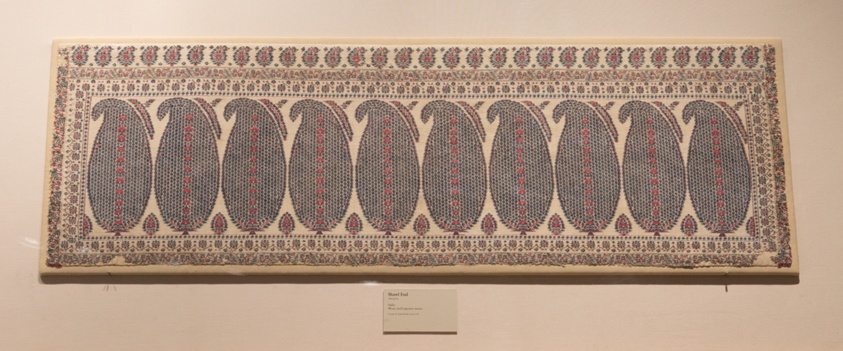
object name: Costume and Accessories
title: Shawl End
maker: India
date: c. 1805–10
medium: Wool, twill tapestry weave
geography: India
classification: weaving; costume